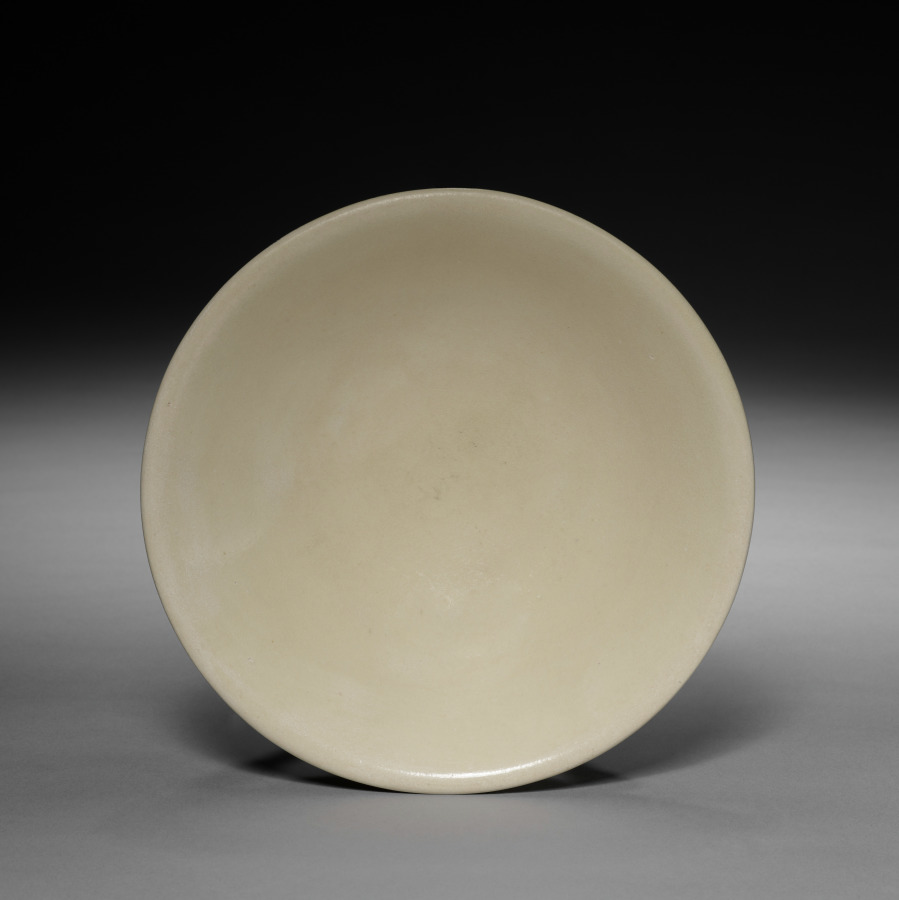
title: Ding Ware Bowl of the Xing Type with Bi-Disc Foot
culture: China, Henan province, Gongxian kilns, Five dynasties (907–60)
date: 907–60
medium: White stoneware with ivory-white glaze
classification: Ceramic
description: An ivory-colored glaze covers this shallow bowl with a solid flat foot ring, revealing an almost pure white body. Bowls of this type and shape were used for drinking tea and were traded as far as Samarra (modern Iraq). Red tea consumed during the Tang dynasty (618–906) was believed to look best in pale green or white-glazed bowls. When white whisked powdered tea was introduced a century later during the Song dynasty (960–1279), tastes and aesthetics for tea ceramics changed and dark-glazed teabowls were preferred.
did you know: The bowl’s foot ring is shaped like a Neolithic bi (璧), a flat jade disc with a central circular hole, which had some ritual function.